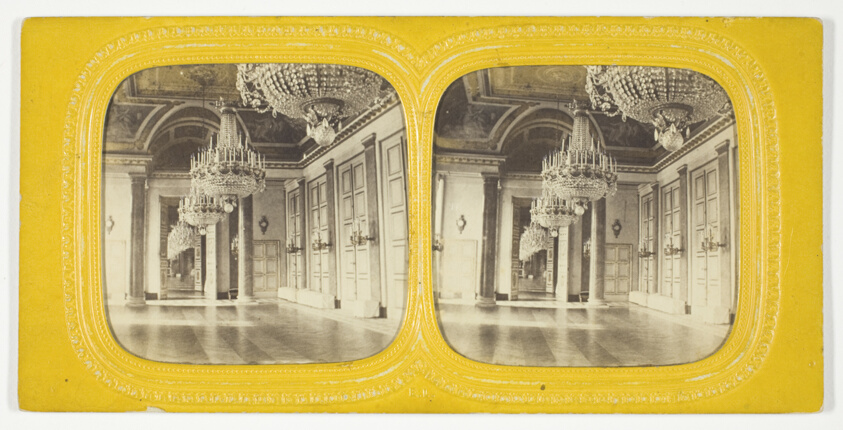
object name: Photograph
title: Salle des Gardes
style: 19th century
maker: Artist unknown; French, late 19th century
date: 1875/99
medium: Albumen print, stereo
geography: France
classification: photography; photograph